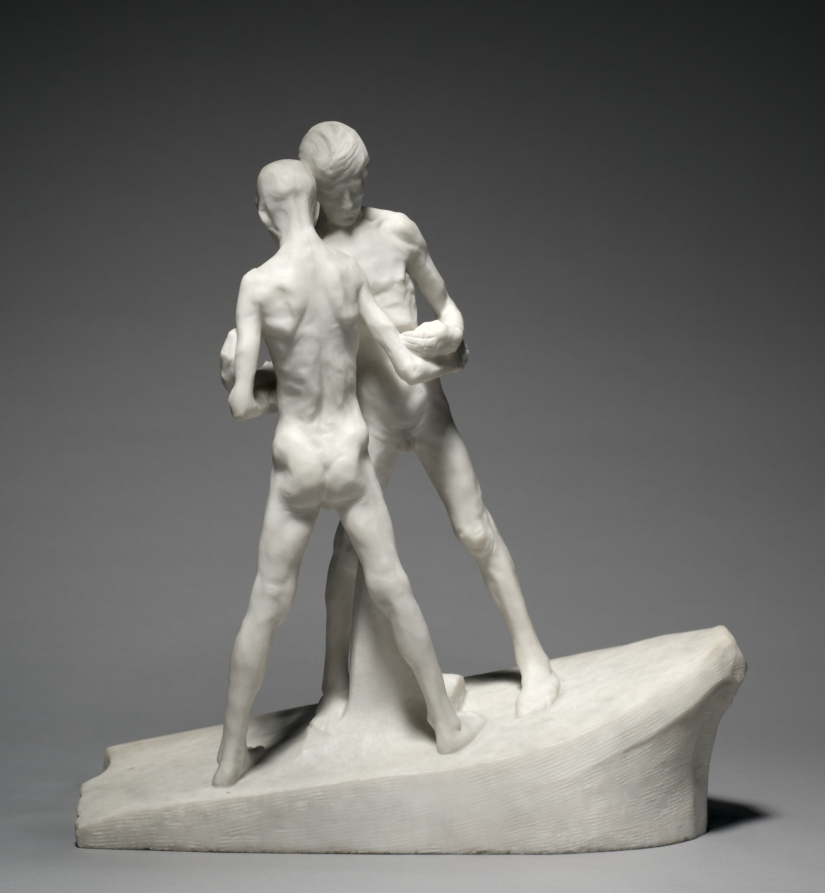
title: Solidarity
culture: Belgium, late 19th century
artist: George Minne (Belgian, 1866–1941)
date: 1898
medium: marble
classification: Sculpture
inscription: Signed near left foot of taller figure: "G. Minne"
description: In 1898, the Belgian Labor Party commissioned George Minne to make a memorial for Jean Volders, the Socialist movement leader. Rather than making a traditional portrait, Minne represented the socialist ideal of prioritizing cooperation over competition, creating an allegory of brotherhood with two nude men standing in a boat, anxiously trying to keep their balance in a storm. The Labor Party disliked Minne’s design and withdrew the commission. In anger, Minne destroyed his nearly 10-foot-tall plaster model, but the artist’s friends and contemporary critics recognized the power of the sculpture. A smaller study survived and was later cast in bronze. This marble version is the only carved example of the composition known to have been completed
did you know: Minnne’s sculpture explores spiritual life and inner conflict. His work focused on premodern themes and greatly influenced artists in Belgium, France, and Germany.